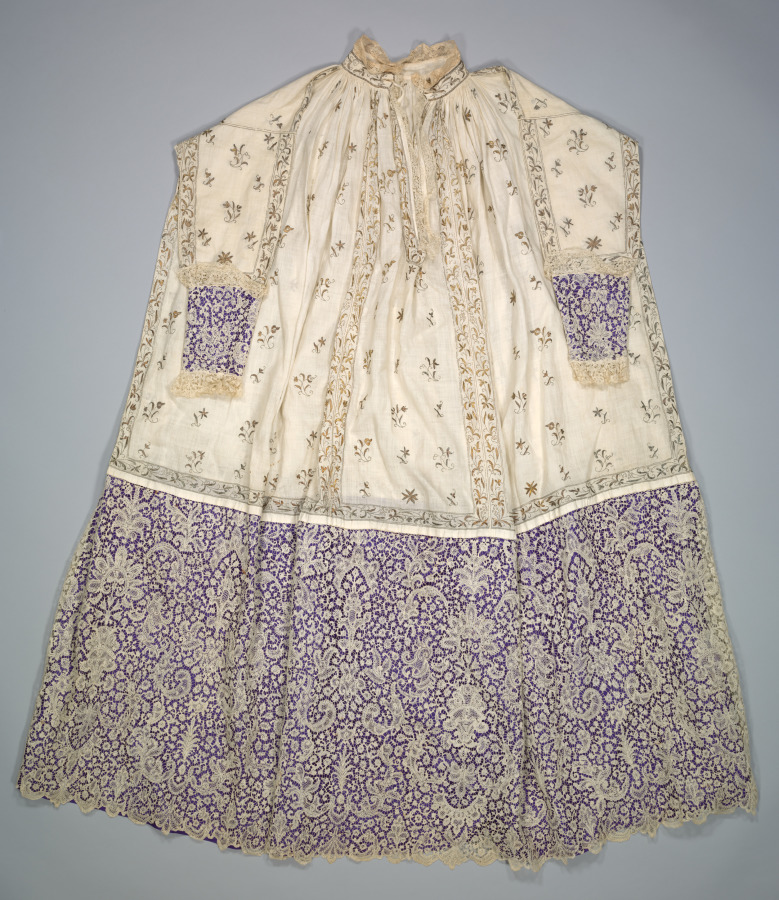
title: Alb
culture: Spain: embroidered linen; Flanders: bobbin lace (Point d’Angleterre) flounce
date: Embroidered Linen: 1600s; Bobbin Lace (Point d’Angleterre) Flounce: 1700s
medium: Plain weave linen embroidered in gold and silver; linen bobbin lace (Point d’Angleterre a Reseau)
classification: Garment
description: This beautiful vestment, called an alb, was worn under other liturgical garments by the clergy who served at the altar. Embroidered with gilt-metal thread flora on a linen ground, it is trimmed with a flounce and cuffs of lace, the most fashionable and expensive material at the time. Its purple silk lining indicates that it belonged to an archbishop. The exquisitely worked bobbin lace consists of two large composite floral designs flanked by popular curved forms on an elaborate bar ground that repeats ten times around the flounce.